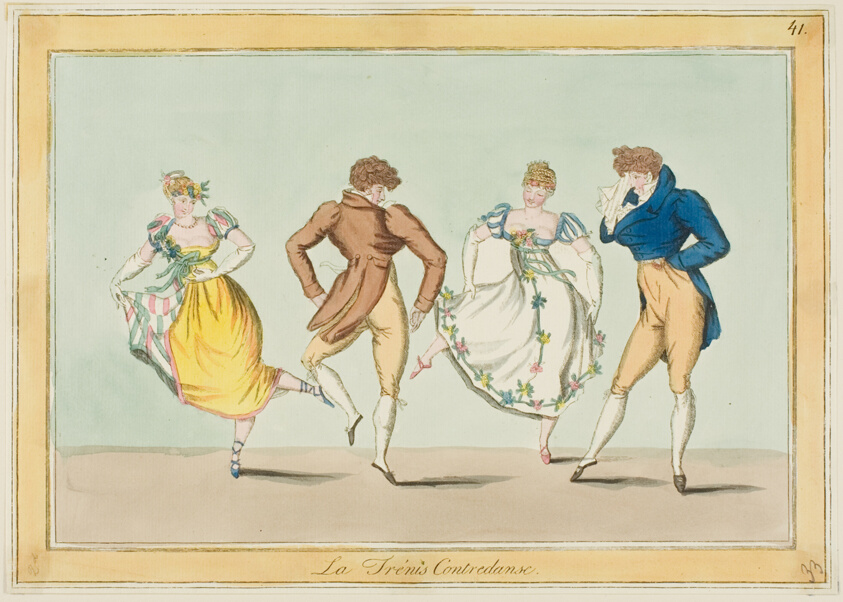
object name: Print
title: La Trenis Contredanse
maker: Unknown Artist; French, 19th century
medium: Hand-colored etching, with roulette, on cream laid paper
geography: France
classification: etching; print; prints and drawing